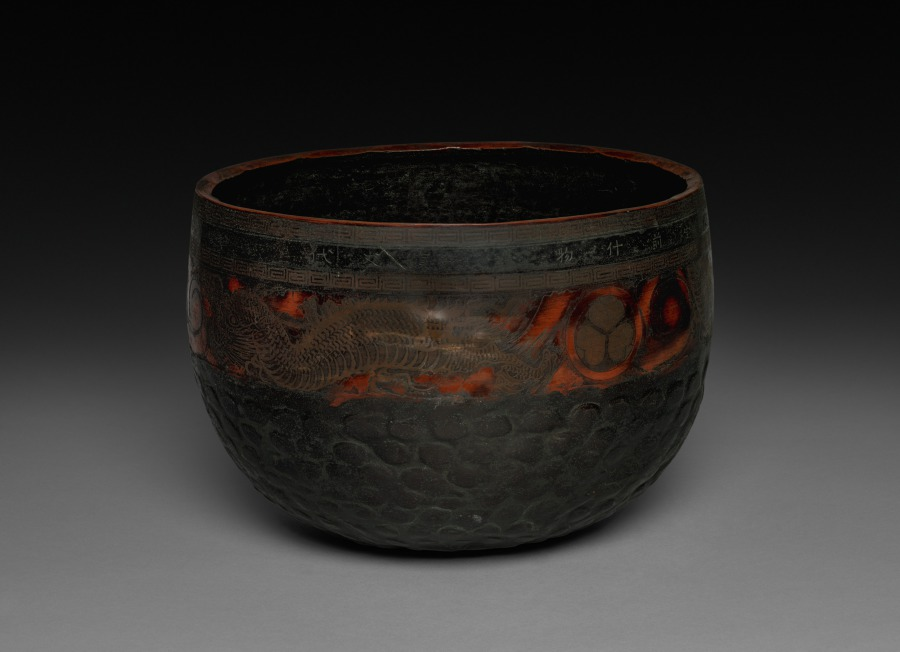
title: Gong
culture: Japan, Edo period (1615–1868)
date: early to mid-1800s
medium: bronze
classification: Metalwork